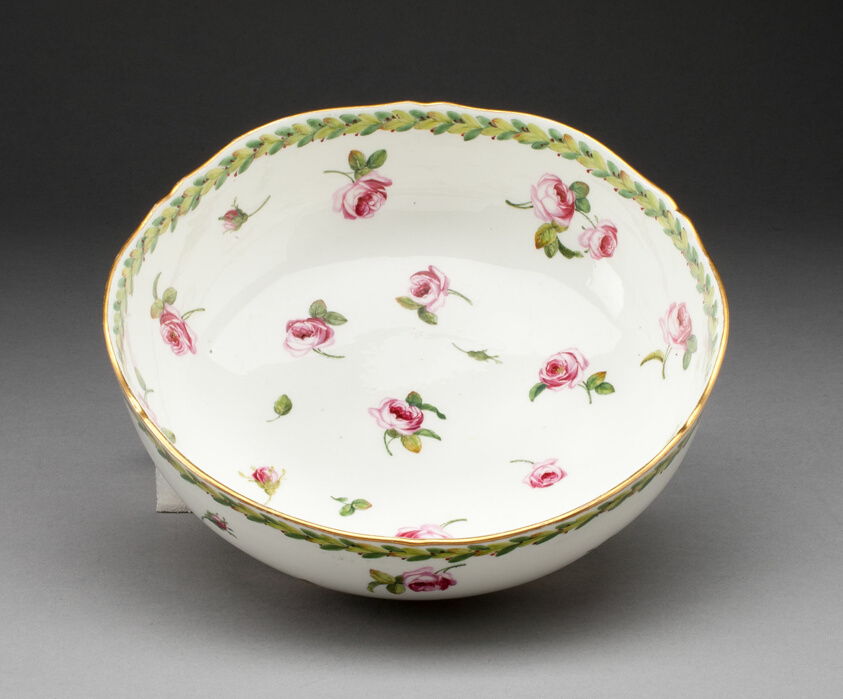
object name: Ceramics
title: Saladier Bowl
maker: Sèvres Porcelain Manufactory; French, founded 1740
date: 1773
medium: Soft-paste porcelain, polychrome enamels, and gilding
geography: Sèvres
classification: bowl; tableware; dish (vessel); ceramics; porcelain; european decorative arts